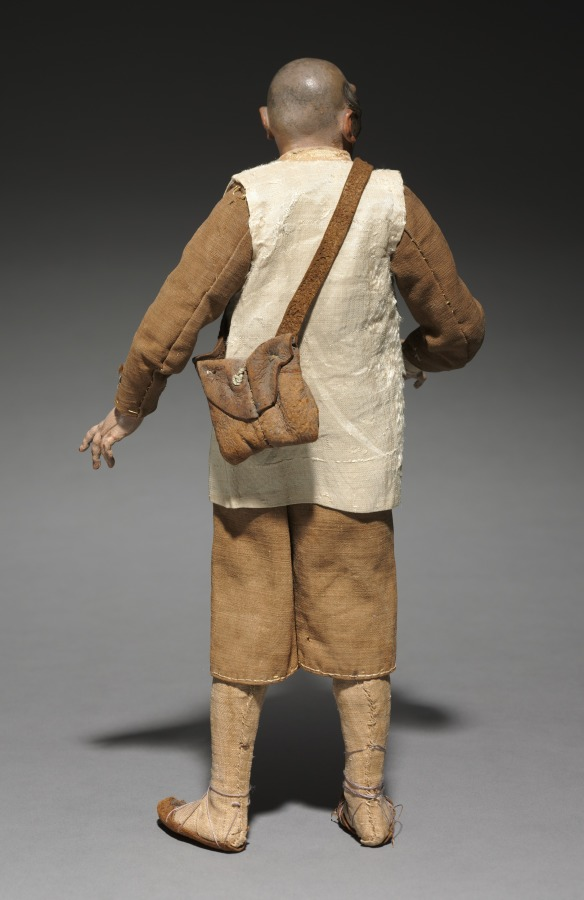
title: Figure from a Crèche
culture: Italy, Naples, late 18th-early 19th century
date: 1780–1830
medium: painted wood and terracotta with various textiles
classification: Sculpture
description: The practice of creating scenes of the Nativity for the home dates from the early 1700s in Italy, where people began to set up doll-like figures of about a foot or less in height. The custom was particularly popular in Naples around 1800, where crèche scenes (crèche means cradle, or crib) included many figures, whose heads and hands of painted terracotta, stuffed cloth bodies, and clothing adapted from contemporary local costumes gave them an amazingly realistic character. Representations of the birth of Jesus can be traced to the first few centuries of Christianity. Both living creatures and sculptural depictions of them were used from early times. By the late middle ages it was customary to create life-size figures of wood or stone, naturalistically painted, to represent the characters who participated in the events of Jesus's early life. These sculptures were then arranged in scenes illustrating one or both of the most important of these events, the Adoration of the Shepherds and the Adoration of the Magi-the three kings from the East who came to pay homage to the Christ child. Used in churches, these large figures were especially popular in Italy, Central Europe, Spain, and Portugal.